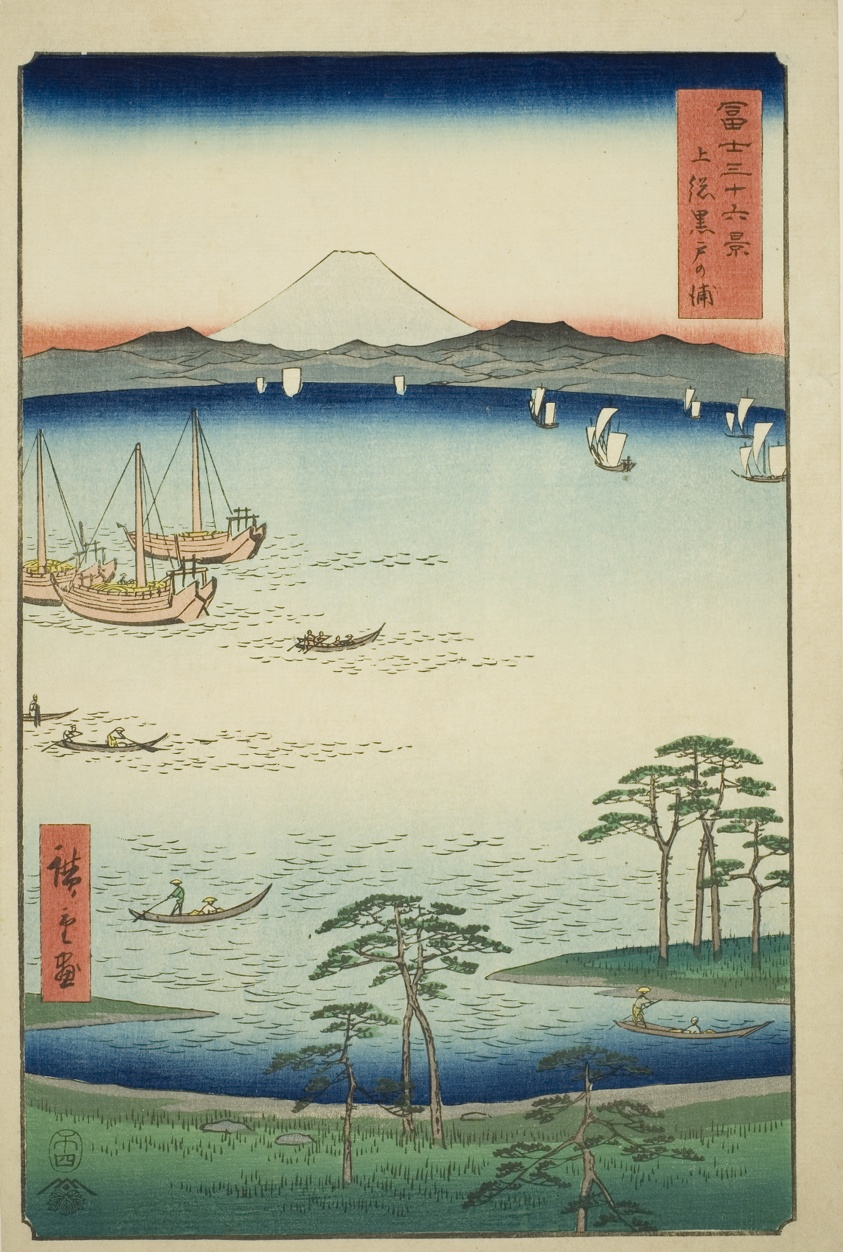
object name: Print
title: Kurodo Bay in Kazusa Province (Kazusa Kurodo no ura), from the series "Thirty-six Views of Mount Fuji (Fuji sanjurokkei)"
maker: Utagawa Hiroshige 歌川 広重; Japanese, 1797-1858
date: 1858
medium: Color woodblock print; oban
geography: Japan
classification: woodblock print; print; asian art